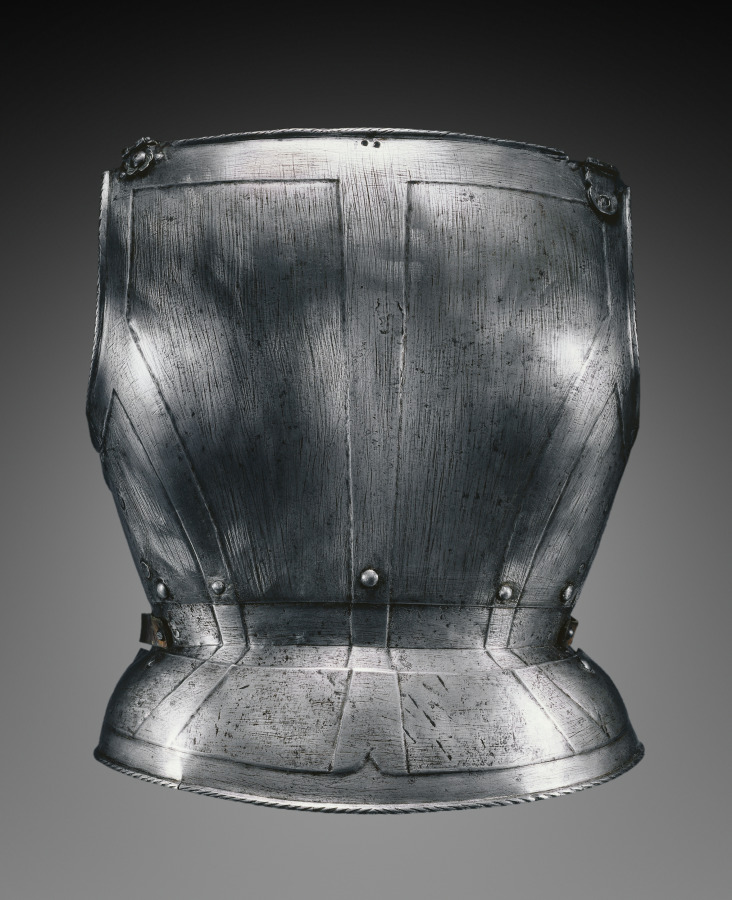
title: Backplate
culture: Germany, Landshut, mid-16th century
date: mid-1500s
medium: steel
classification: Arms and Armor